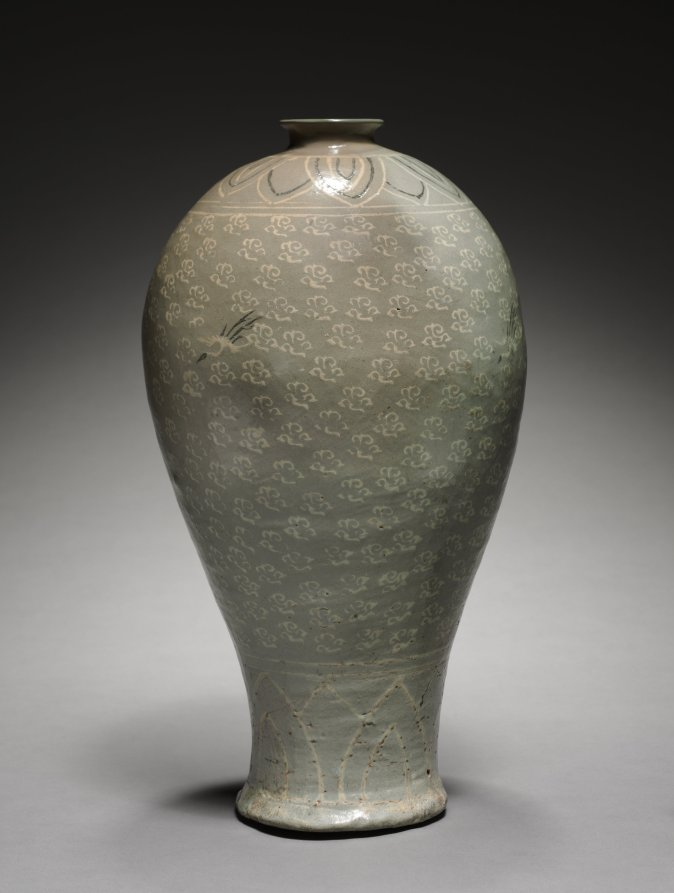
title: Prunus Vase with Inlaid Clouds and Flying Cranes Design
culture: Korea, Goryeo dynasty (918–1392)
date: 1300s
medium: celadon ware with inlaid white and black slip decoration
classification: Ceramic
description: As early as the seventh century, the practice of drinking tea and wine became an important part of elite culture in Korea. Once used to store alcoholic beverages, this type of vase features a wide body followed by a sharply rounded shoulder, a short neck and a small opening. Most of the remaining examples no longer have a lid, but originally it may have had a lid that not only covered the opening, but also served as a cup.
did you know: Prunus vases such as this one are often believed to contain a branch of plum blossoms, but recent research reveals that these lidded vases were also used to contain cooking liquid such as sesame oil.